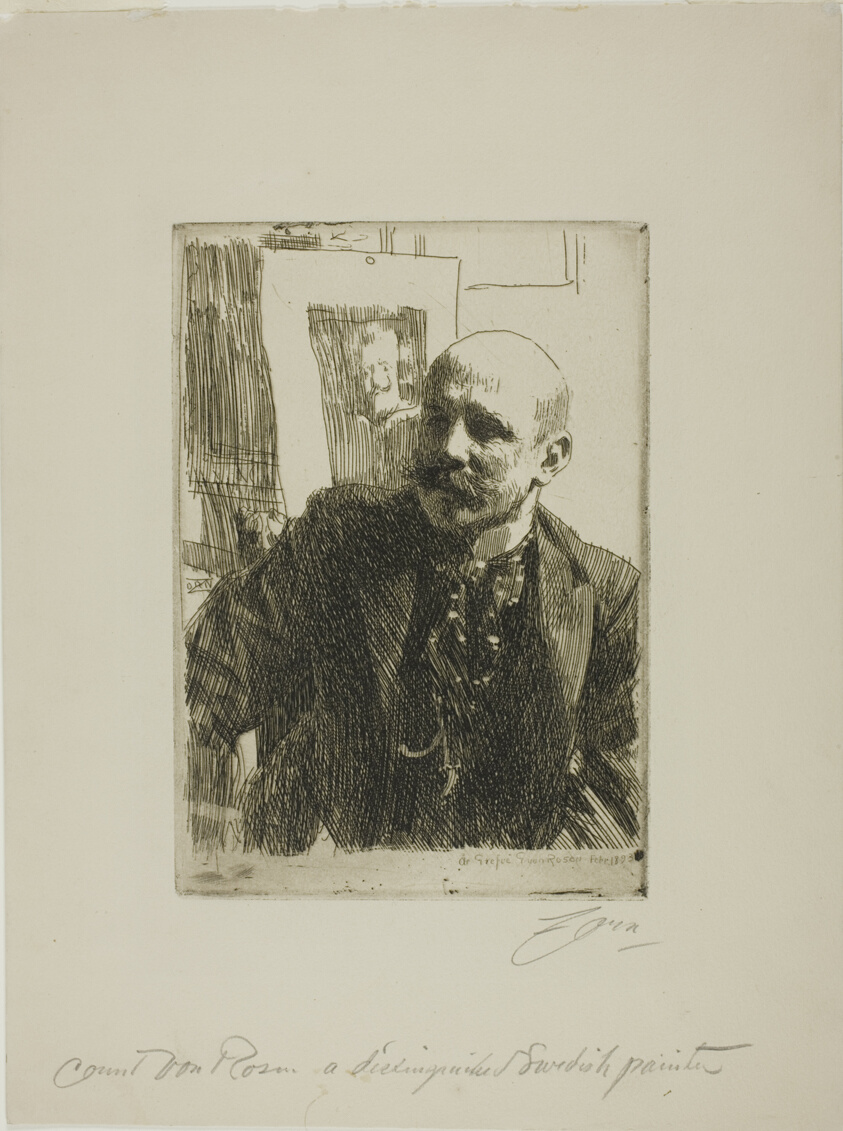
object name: Print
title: Georg von Rosen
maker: Anders Zorn (Swedish, 1860-1920)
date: 1893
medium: Etching on cream wove paper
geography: Sweden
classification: etching; print; prints and drawing